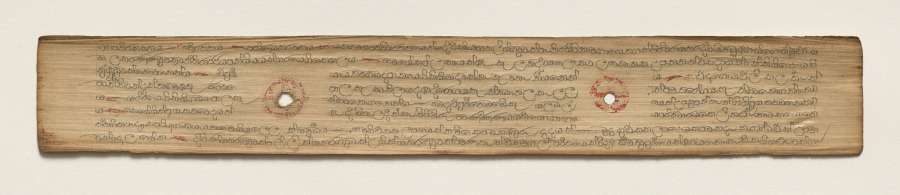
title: Leaf from a Buddhist Manuscript (verso)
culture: Sri Lanka, Singhalese, Late 17th century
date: c. 1700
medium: fiber paper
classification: Manuscript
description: Palm leaf material is still used for manuscripts in Sri Lanka. The palm leaves are prepared first by boiling them, drying them in the sun, and then rubbing them with oils. Scribes then use a metal stylus to incise the text. Then charcoal powder is wiped across the pages, filling in only the inscribed lines.